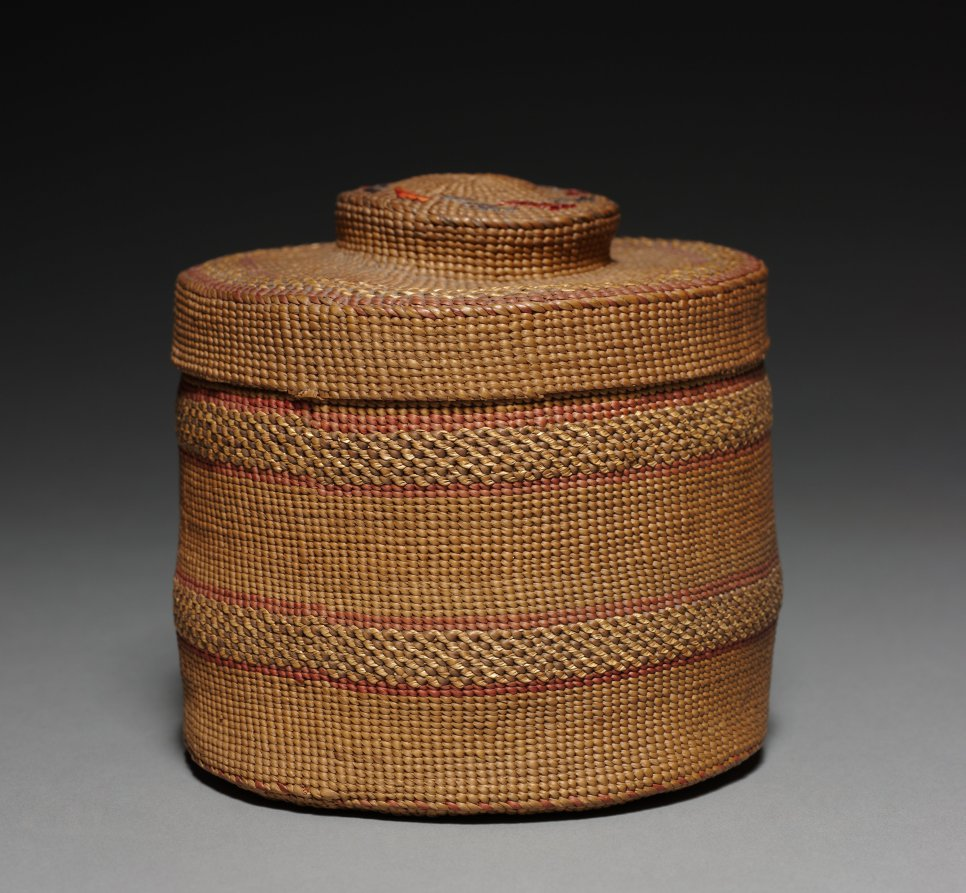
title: Covered Basket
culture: Northwest Coast, Haida, Unassigned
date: Unassigned, before 1917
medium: twilled, imbricated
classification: Basketry